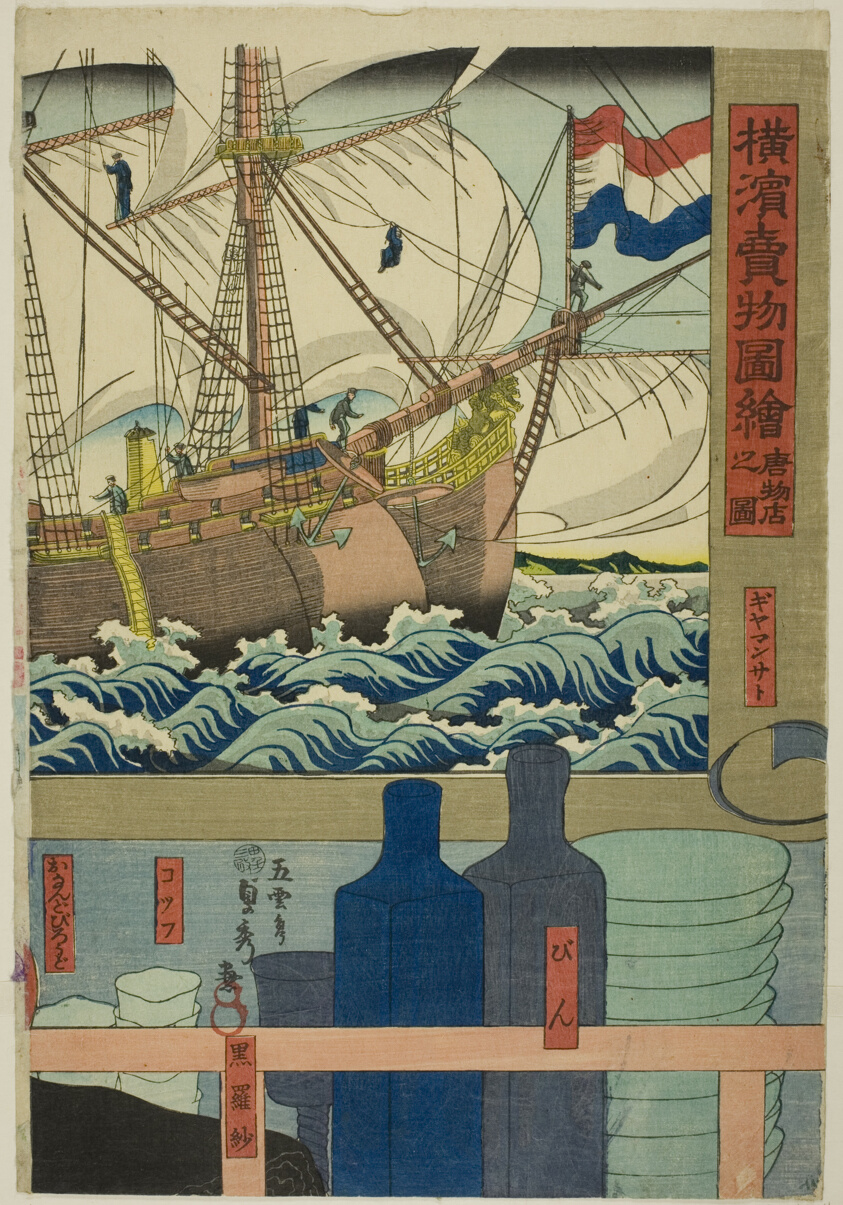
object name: Print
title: Curio Shop (Karamono ten no zu), from the series "Pictures of Goods for Sale at Yokohama (Yokohama urimono zue)"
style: Japanese (culture or style)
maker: Utagawa Sadahide (Japanese, 1807-1873)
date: 1860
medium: Color woodblock print; right sheet of oban triptych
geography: Japan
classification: woodblock print; print; asian art